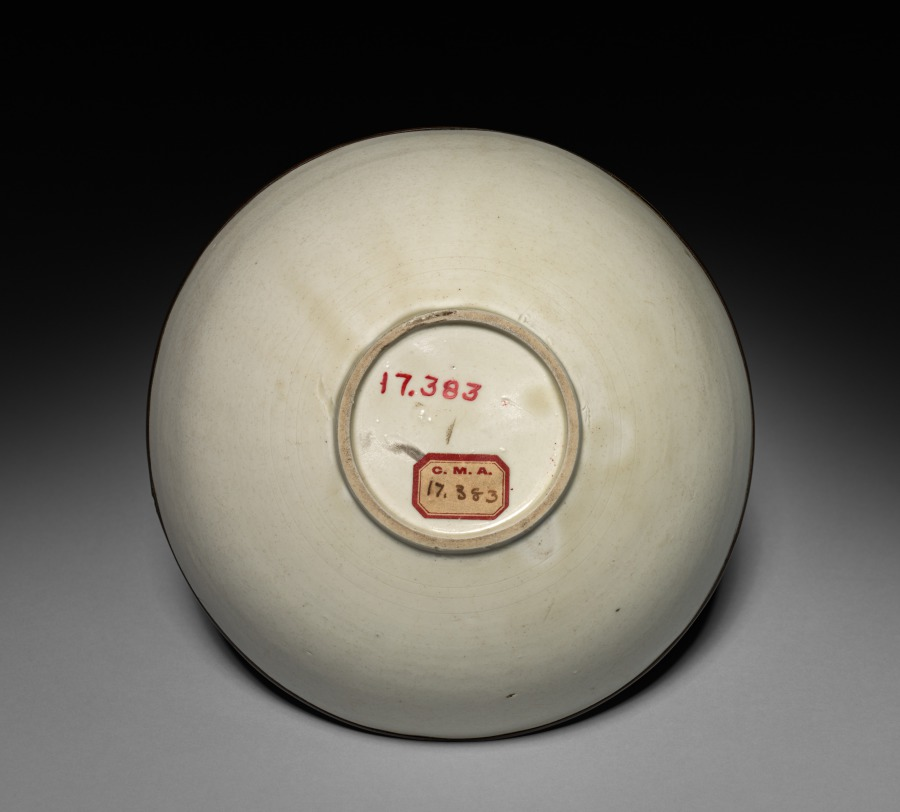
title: Bowl: Ding ware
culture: China, Jin dynasty (1115-1234)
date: 12th-13th Century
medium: glazed white porcelain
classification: Ceramic